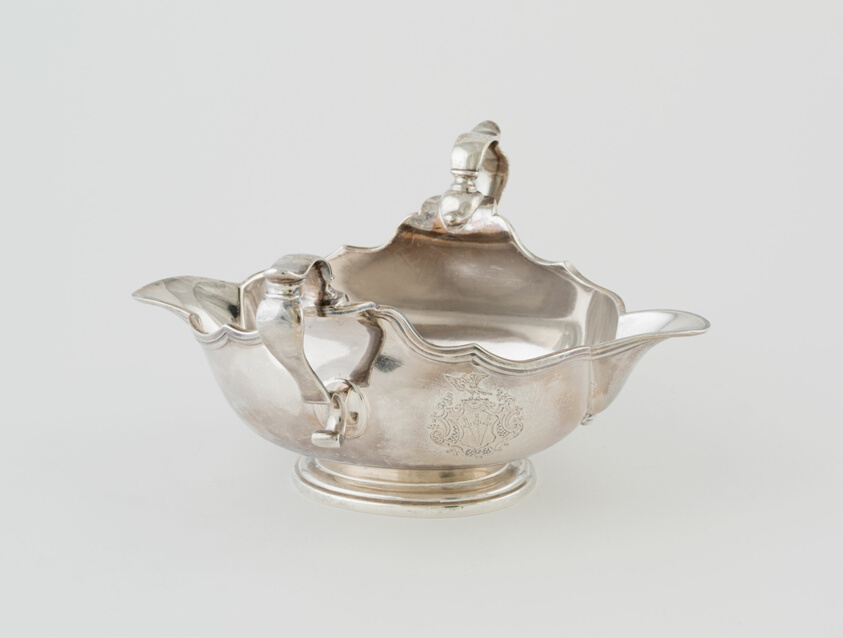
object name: Metalwork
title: Two-Handled Sauceboat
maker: Edward Feline; English, active 1730/35; England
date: 1730/31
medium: Silver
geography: England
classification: silver; metalwork; european decorative arts